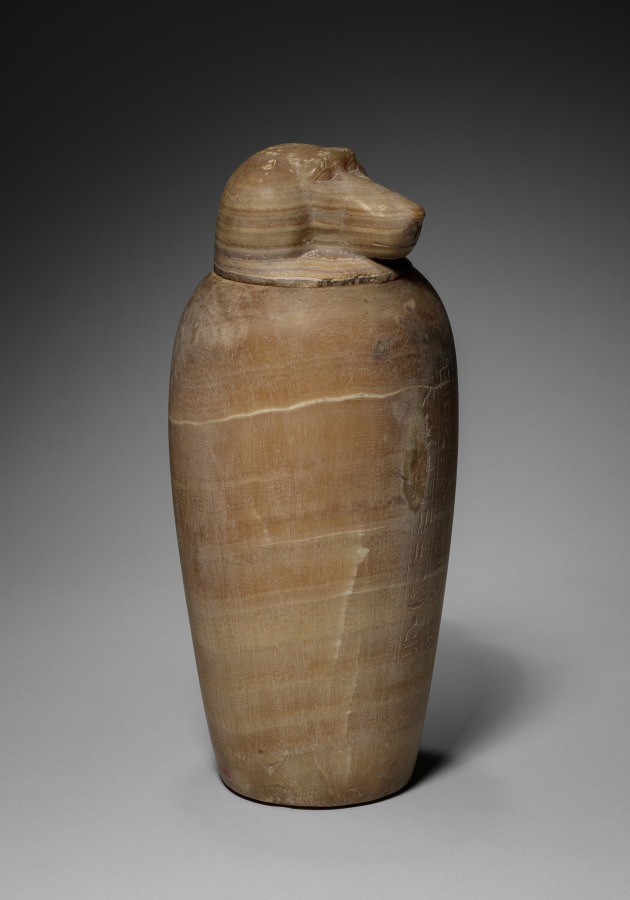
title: Canopic Jar with Baboon's Head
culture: Egypt, Late period (715–332 BCE), Dynasty 26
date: 664–525 BCE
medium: travertine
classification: Funerary Equipment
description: In the process of mummification, the liver, lungs, stomach, and intestines were removed, separately embalmed, and stored in specialized jars known as canopic jars (after a sailor in Greek mythology, who died at the town of Canopus in the Nile Delta and was worshipped there in the form of a human-headed jar). Each organ was identified with one of four funerary deities collectively known as the Sons of Horus: the liver with Imsety (man's head), the lungs with Hapy (baboon's head), the stomach with Duamutef (jackal's head), and the intestines with Qebehsenuef (falcon's head). It was their duty to protect the deceased and restore to him his body parts in the hereafter.